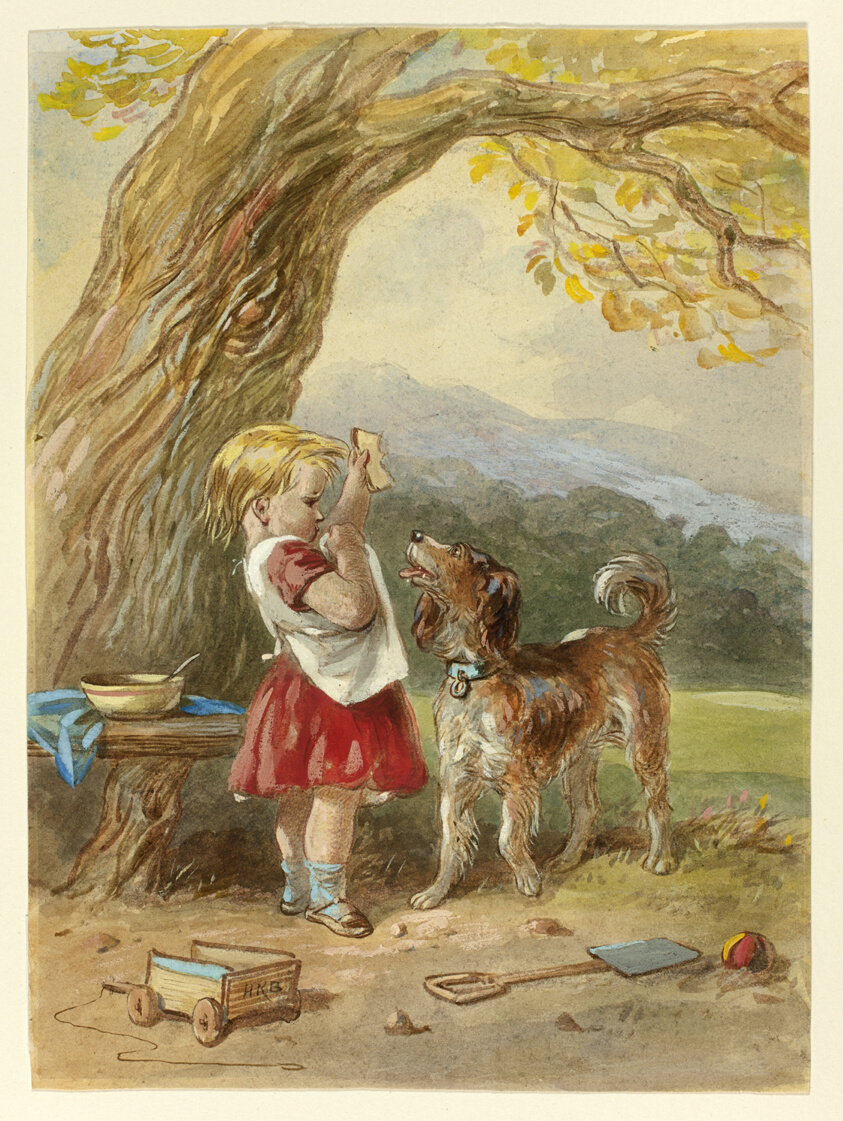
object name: Drawing and Watercolor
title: Little Girl and Dog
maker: Hablot Knight Browne (English, 1815-1882)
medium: Watercolor and gouache, over charcoal, on ivory wove paper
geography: England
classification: watercolor; drawings (visual works); prints and drawing